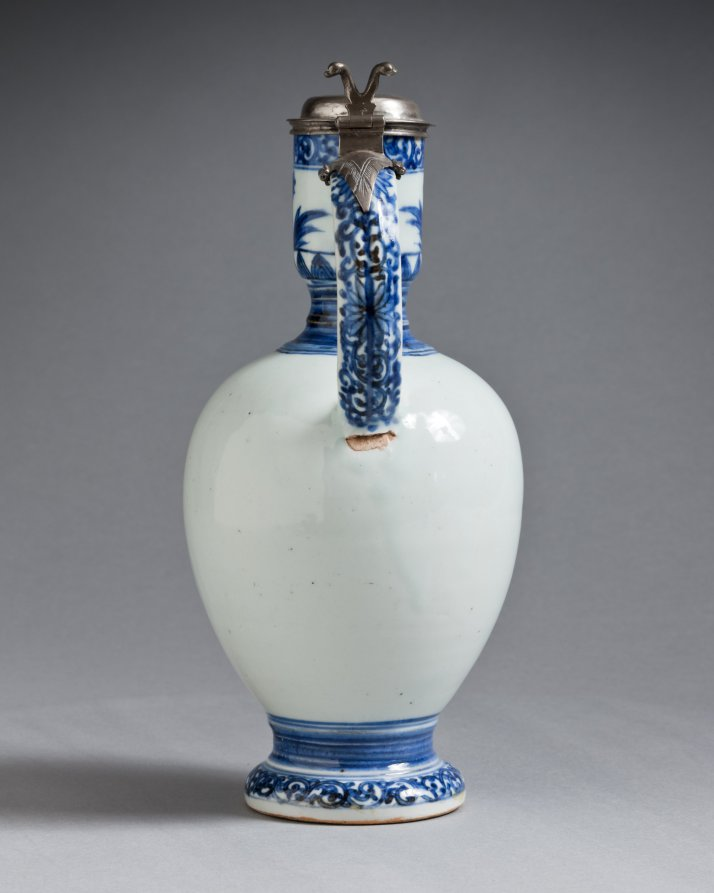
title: Jug with Silver Mounts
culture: Japan, Edo period (1615–1868)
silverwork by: Barent van Leeuwen (Dutch, 1637–1682)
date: c. 1662–76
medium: porcelain with underglaze blue decoration and silver mounts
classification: Ceramic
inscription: [on silver]: town mark for Amsterdam; lion rampant crowned (alloy mark for 0-934 silver); d (date letter for 1666), maker's mark of Barent van Leeuwen.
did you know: The coat of arms on this jug are those of the Valckenier family, active in the Dutch East India Company.